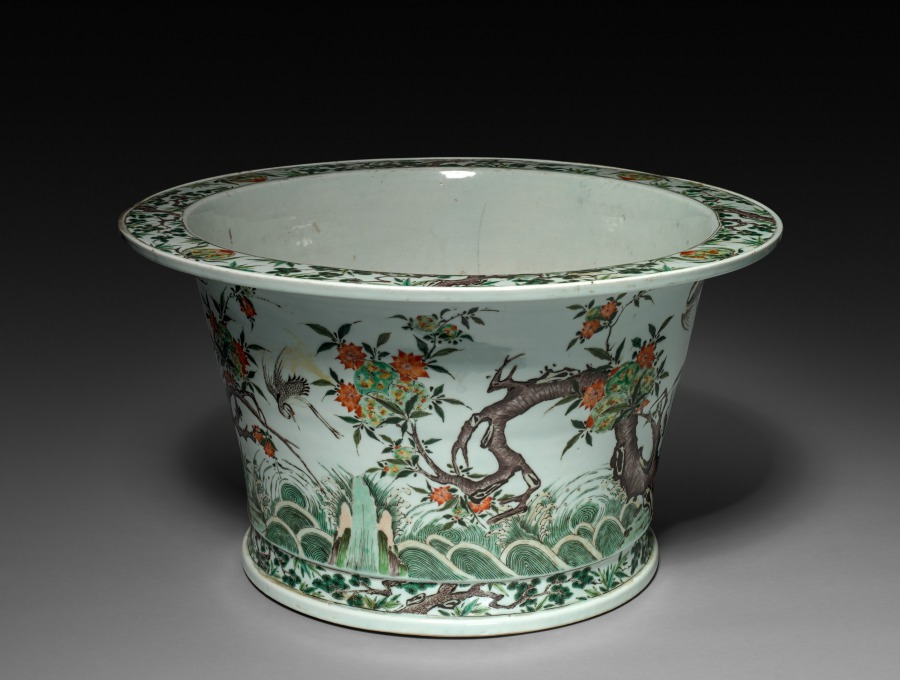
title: Jardiniere with Cranes and Peaches over Waves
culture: China, Jiangxi province, Jingdezhen kilns, Qing dynasty (1644-1911), Kangxi reign (1661-1722)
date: 1662–1722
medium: porcelain with famille verte overglaze enamel decoration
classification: Ceramic